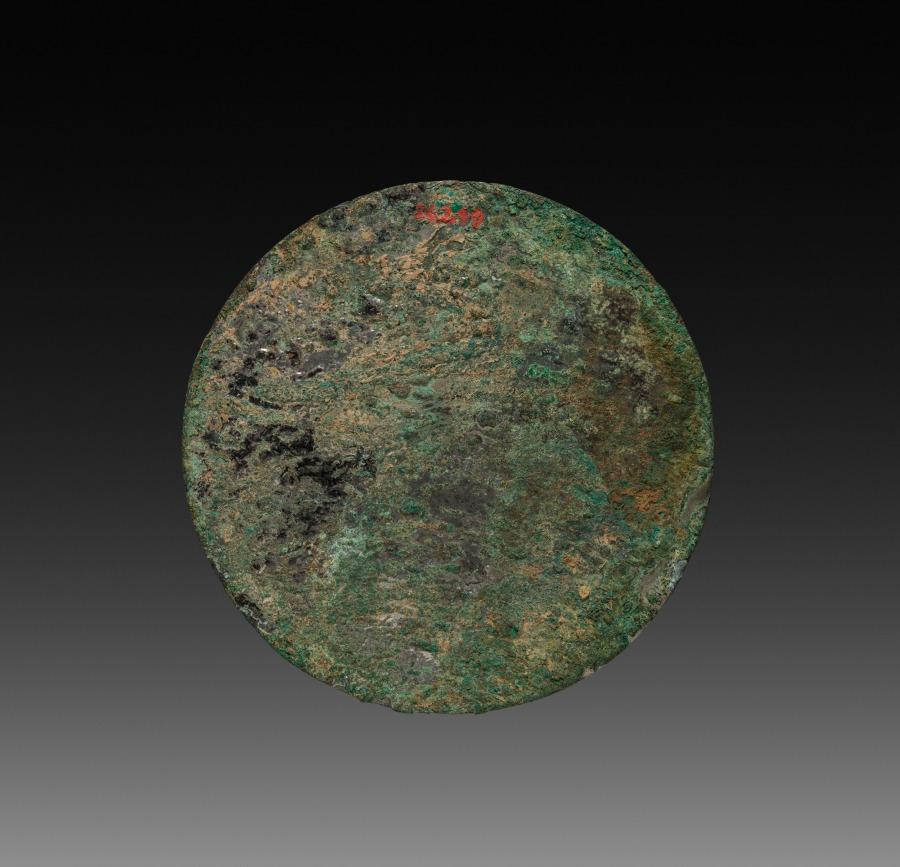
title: Mirror with Paired Felines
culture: China, Sui dynasty (581-618) - Tang dynasty (618-907)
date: late 500s–600s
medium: bronze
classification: Metalwork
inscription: The maiden's chamber---bright and clear Her precious mirror---round It has doubled both her eyes As she danced with the lonely phoenix. Its light flows over her powdered face, painted brow Diffusing radiance upon her silken gauze While with infinite delicacy She demurely glances at herself.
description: The two leopard-like creatures stalking each other around the knob of this mirror display a naturalistic animal style that emerged with the Sui and Tang unification of China. Their constrained energy contrasts markedly with the reserved image of a young woman described in the encircling poetic inscription: The maiden's chamber—bright and clear Her precious mirror—round It has doubled both her eyes As she danced with the lonely phoenix. Its light flows over her powdered face, painted brow Diffusing radiance upon her silken gauze While with infinite delicacy She demurely glances at herself. Unlike the tightly integrated Han mirrors, examples of the Sui and Tang are typically inscribed with romantic verses that bear no relation to their accompanying designs.